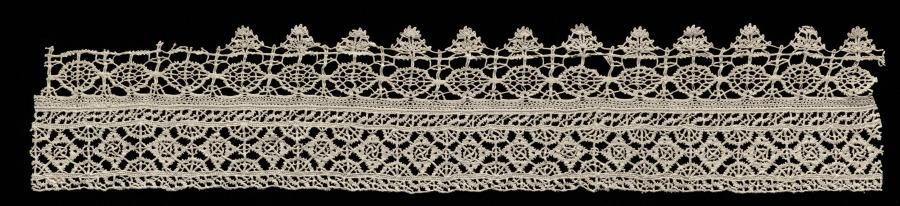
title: Lace Band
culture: Italy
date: 1500s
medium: Linen: needle lace (reticella) and bobbin lace edging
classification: Lace